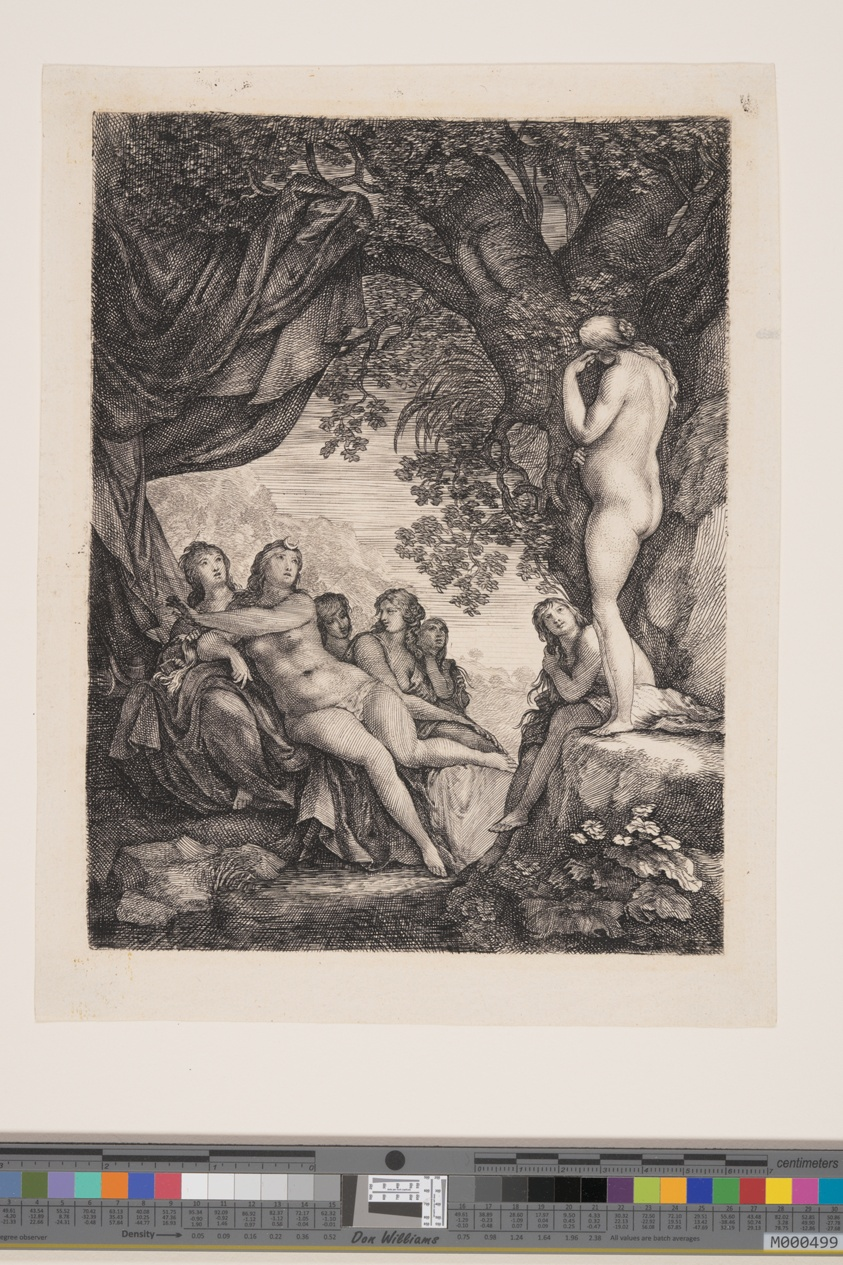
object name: Print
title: Diana and Callisto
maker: Moses van Uyttenbroeck (Dutch, c. 1595–before 1647)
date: c. 1615-1645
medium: Engraving on laid paper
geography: Netherlands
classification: engraving; paper; print; prints and drawing